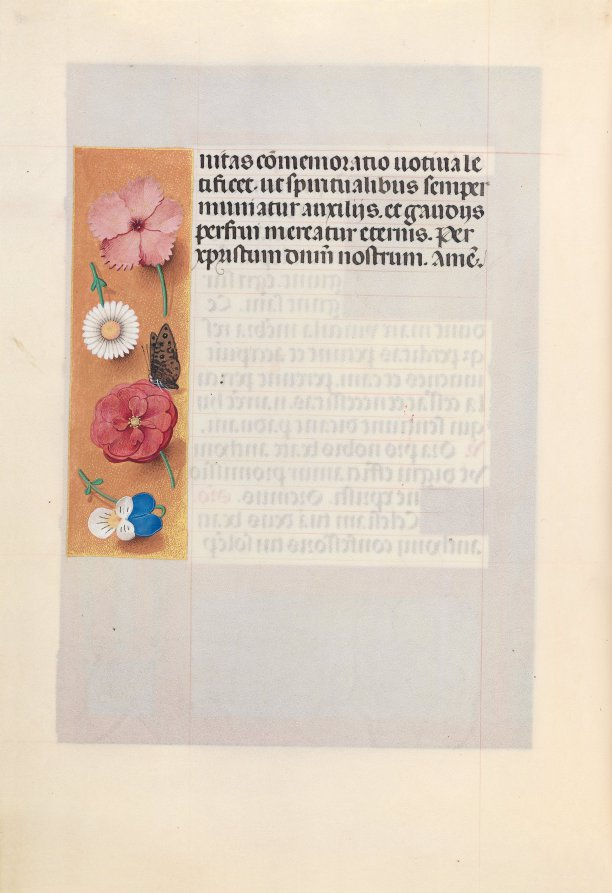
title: Hours of Queen Isabella the Catholic, Queen of Spain: Fol. 188v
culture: Flanders, Ghent and Bruges, late 15th century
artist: Master of the First Prayerbook of Maximillian (Flemish, c. 1444–1519)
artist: and Associates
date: c. 1500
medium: ink, tempera, and gold on vellum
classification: Bound Volume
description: This manuscript was illuminated by a circle of at least five highly organized manuscript painters active in the Flemish cities of Ghent and Bruges. The principal illuminator was Alexander Bening, who painted the majority of the book's miniatures. Manuscripts produced by this circle of artists are renowned for the decoration of their borders, which typically feature a rich variety of realistically-painted flowers, birds, and butterflies. This prayer book, called a book of hours, was intended not for a cleric, but for the private devotions of a lay person-in this case, Isabella the Catholic, Queen of Spain (1451-1504). Isabella's coat of arms embellishes the book's frontispiece. It is unlikely that the book was commissioned by the Queen herself; rather, she probably received it as a diplomatic gift from someone courting her patronage, perhaps Cardinal Francisco Jimenez de Cisneros. A Franciscan friar, Jimenez was dependent upon Isabella for his advancement, first to the post of Queen's confessor in 1492, and then to Archbishop of Toledo in 1495.